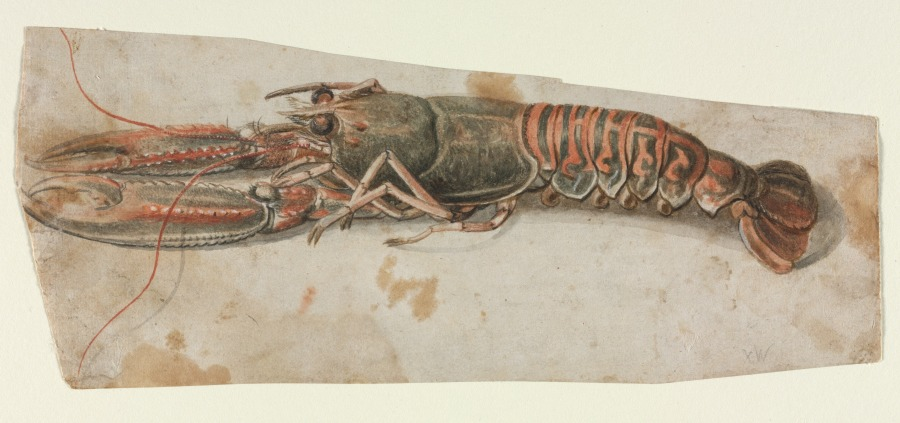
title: Lobster (recto) Sketch of an Armoured Male Figure (verso)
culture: Flanders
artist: Anonymous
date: 1600s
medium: brush and black, gray and brown wash, and red watercolor, heightened with white gouache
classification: Drawing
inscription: lower right, in graphite: XW